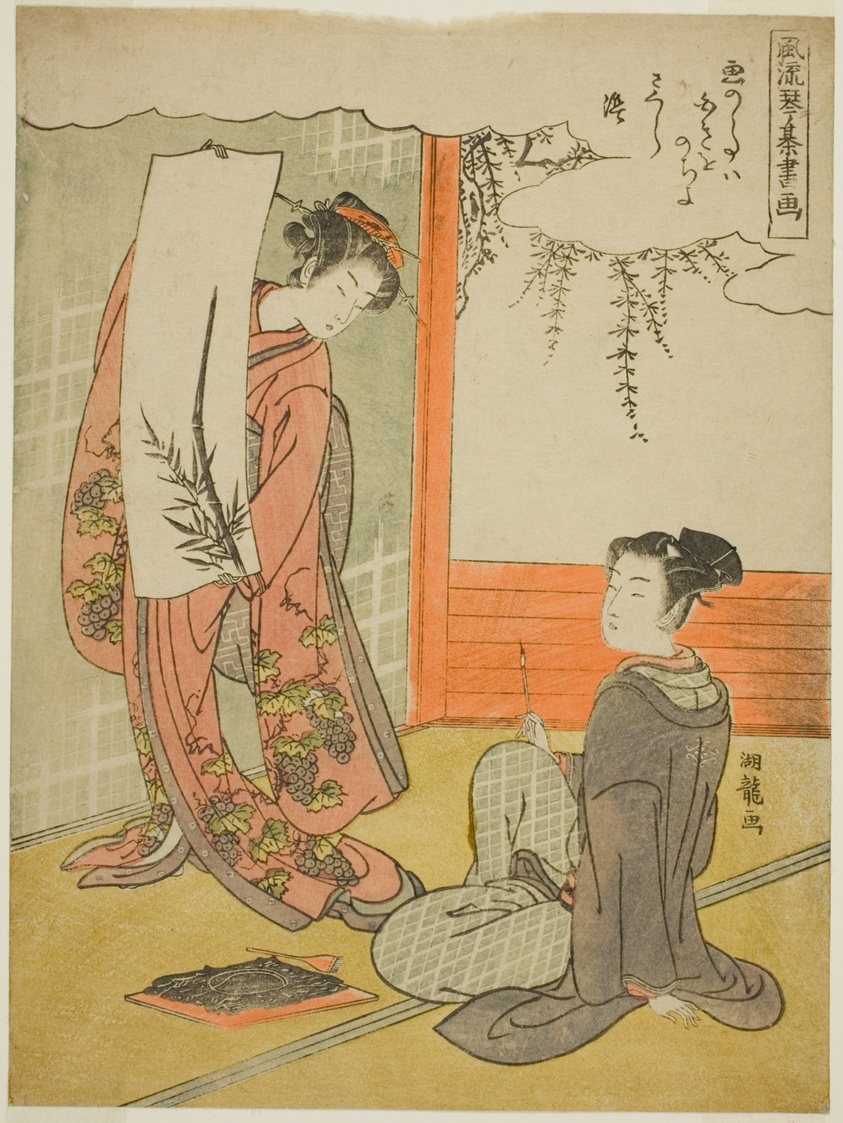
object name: Print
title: Painting, from the series "Fashionable Versions of the Four Accomplishments (Furyu kinkishoga)"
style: Japanese (culture or style)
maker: Isoda Koryusai (Japanese, 1735-1790)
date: c. 1773/75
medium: Color woodblock print; chuban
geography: Japan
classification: woodblock print; print; asian art